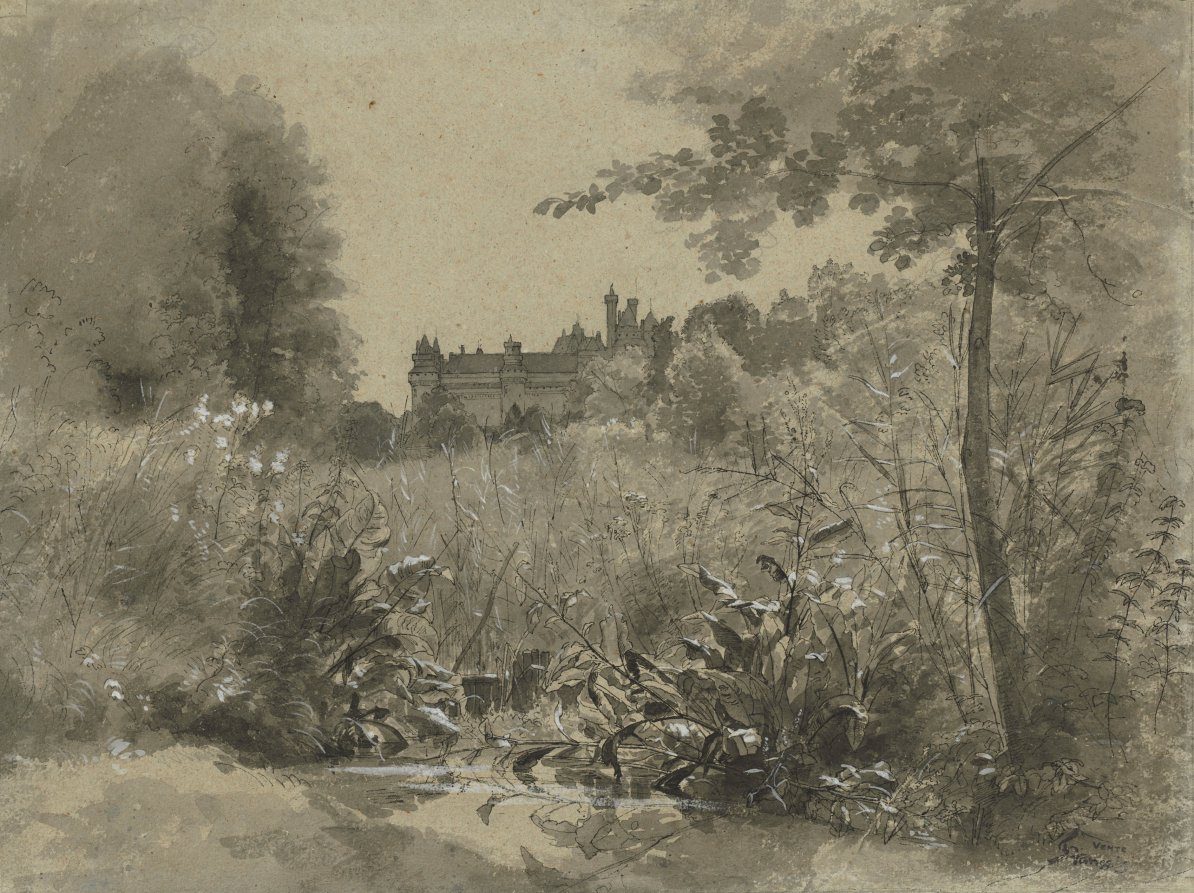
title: View of the Château of Pierrefonds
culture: France, 19th century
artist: François-Louis Français (French, 1814–1897)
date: c. 1870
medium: pen and black ink, brush and black and gray wash, and graphite, heightened with white gouache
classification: Drawing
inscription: verso, center, in graphite: 12 [underlined]; center right, in graphite: Chateau de Pierrefonds / Clisson [crossed out]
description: This lush landscape shows the château of Pierrefonds in the distance framed by flourishing foliage in the foreground. The picture depicts the château from the same viewpoint as in a painting by Camille Corot (see photo), an artist who significantly influenced Français. (Corot is represented in the exhibition by a charcoal drawing [cat. no. 45] hanging nearby.) Corot's picture of Pierrefonds shows the château in ruins, whereas the pristine condition of the building in Français's view indicates that his drawing dates after the château's extensive restoration by the architect Viollet-le-Duc in 1870.